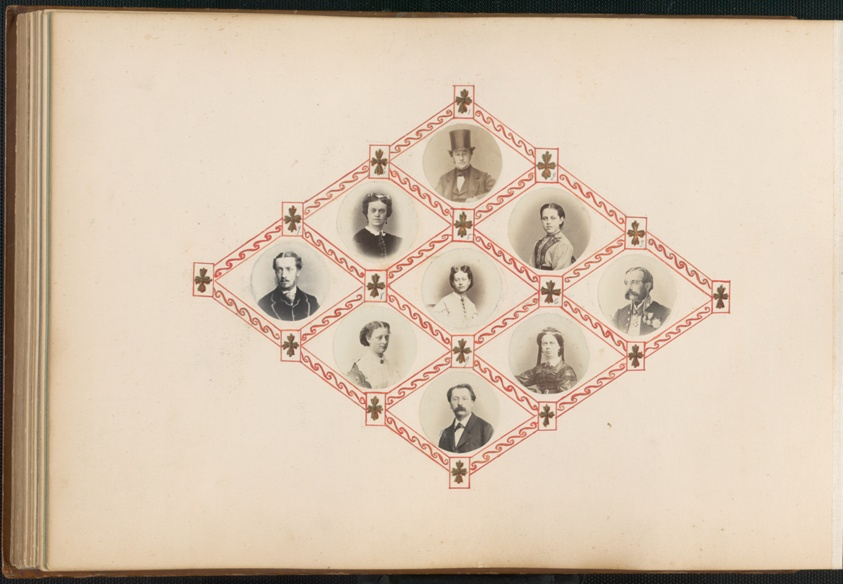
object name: Photograph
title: The Madame B Album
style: 19th century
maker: Marie-Blanche Hennelle Fournier (French, 1831–1906)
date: 1870s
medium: Albumen prints with watercolor (in album)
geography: France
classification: photograph; albumen silver print; photography